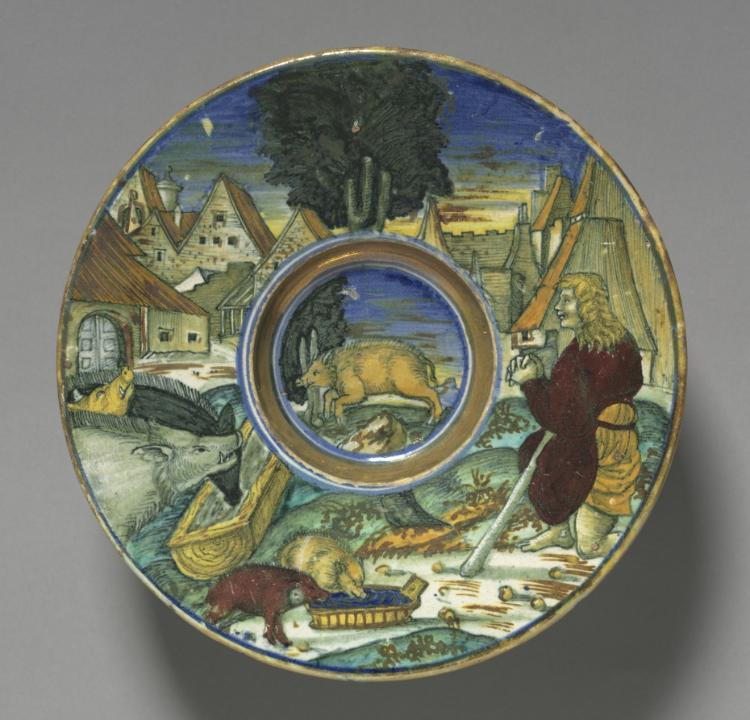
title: Plate: The Prodigal Son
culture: Italy, 16th century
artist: Maestro Giorgio Andreoli (Italian, 1465?–1553)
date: 1528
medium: tin-glazed earthenware with gold and red lustre (maiolica)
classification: Ceramic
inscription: signed: y 1528 x.